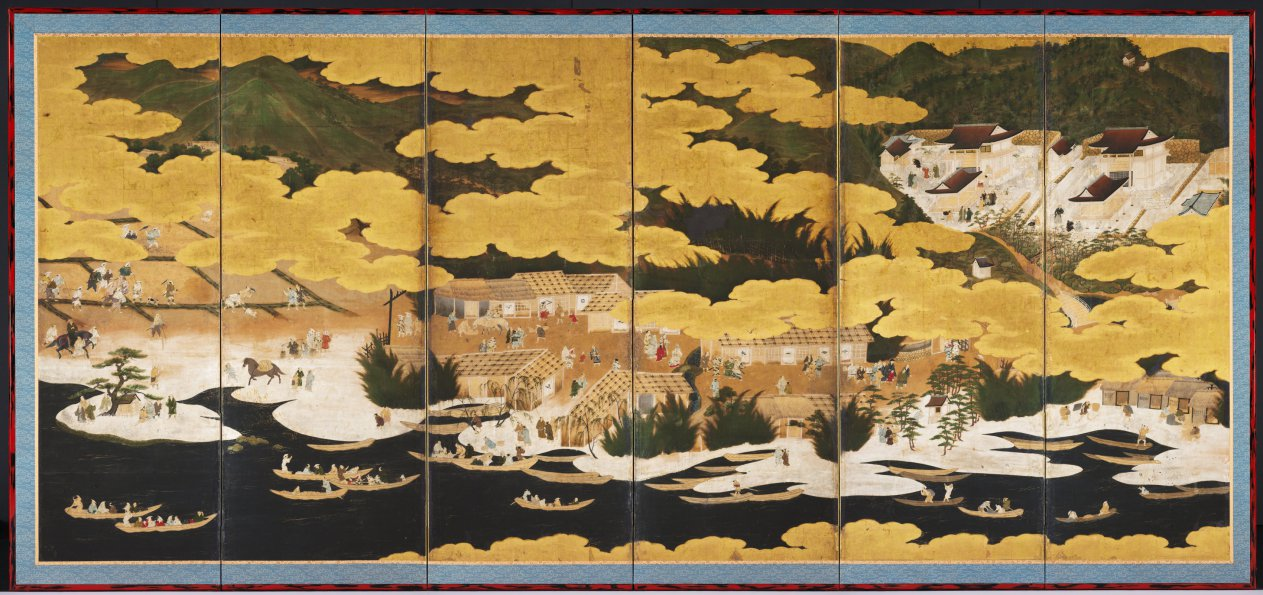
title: Famous Views of Ōmi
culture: Japan, Edo period (1615–1868)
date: 1660s–90s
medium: One of a pair of six-panel folding screens; ink, color, and gold on gilded paper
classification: Painting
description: Ōmi is an area around Lake Biwa near Kyoto. The Shinto shrine Hiyoshi Taisha and the Buddhist temple Ishiyamadera are in the upper right and upper left of the composition, respectively. At center is the pilgrimage route and people in the town before the temple gates. Harvested rice fields to the right and flowering cherry blossom trees at left show seasonal change from winter to spring.